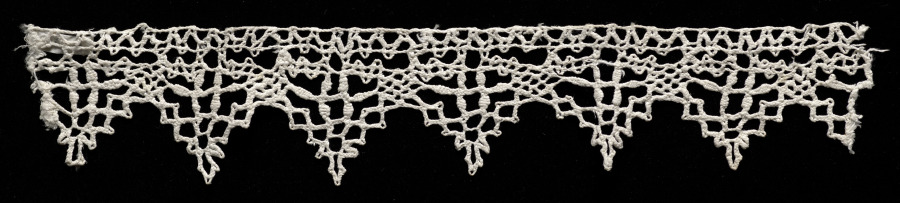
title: Lace Edging of Points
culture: Italy, Genoa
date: 1600s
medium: Bobbin lace (plaited lace)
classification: Lace